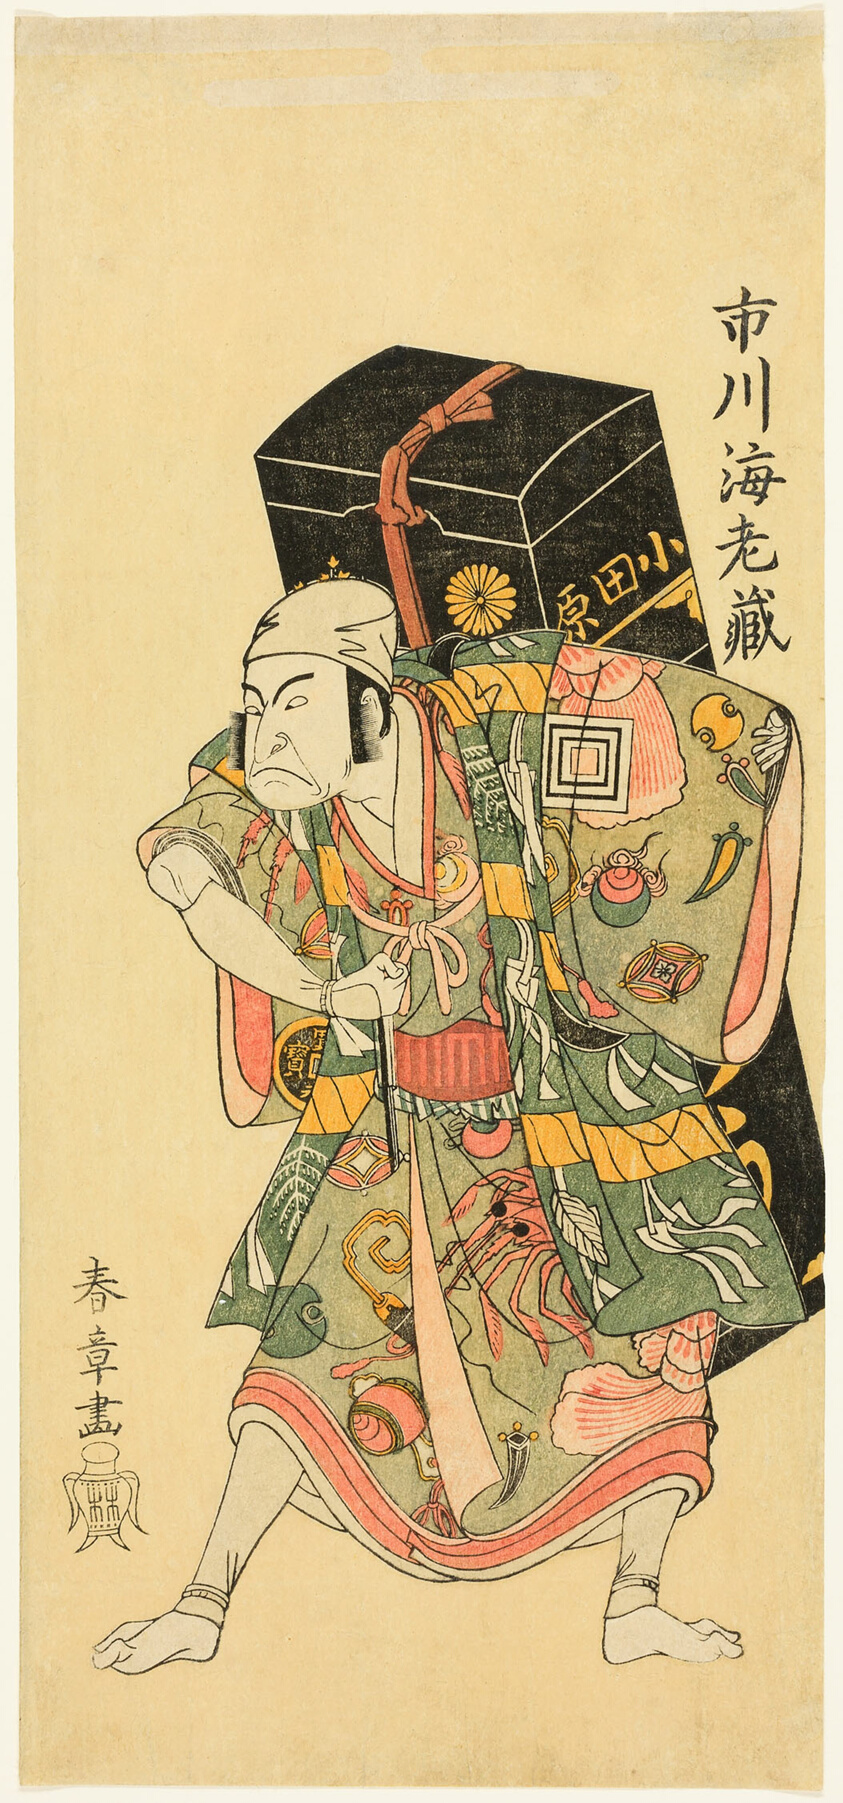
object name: Print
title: Memorial Portrait of Actor Ichikawa Ebizô II (Danjûrô II) as a Peddler of the Medicine Uirô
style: Japanese (culture or style)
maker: Katsukawa Shunshô 勝川 春章; Japanese, 1726-1792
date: About 1768–70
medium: Color woodblock print; hosoban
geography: Japan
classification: woodblock print; print; asian art